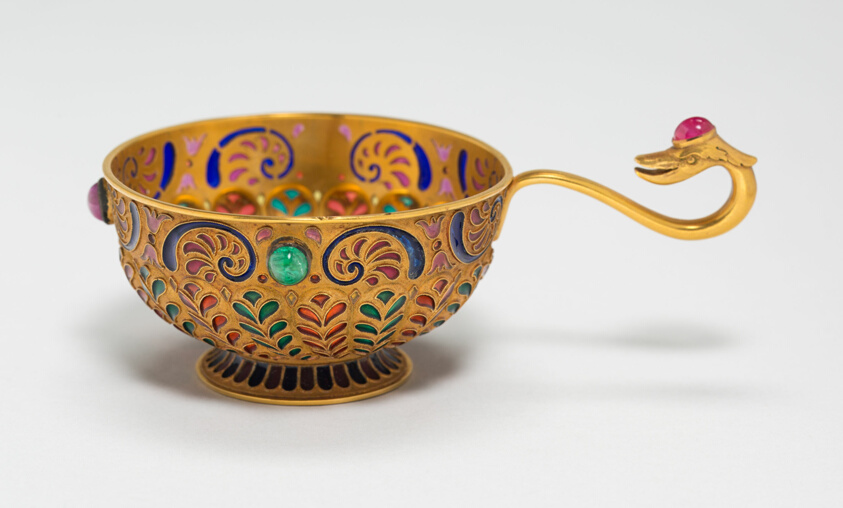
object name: Metalwork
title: Miniature Cup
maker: Alfred Tillander; Russian, 1837-1918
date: c. 1900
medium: Gold, plique-à-jour, and cabochon ruby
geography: Russia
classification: drinking vessel; gold; metal; miniature; european decorative arts; metalwork